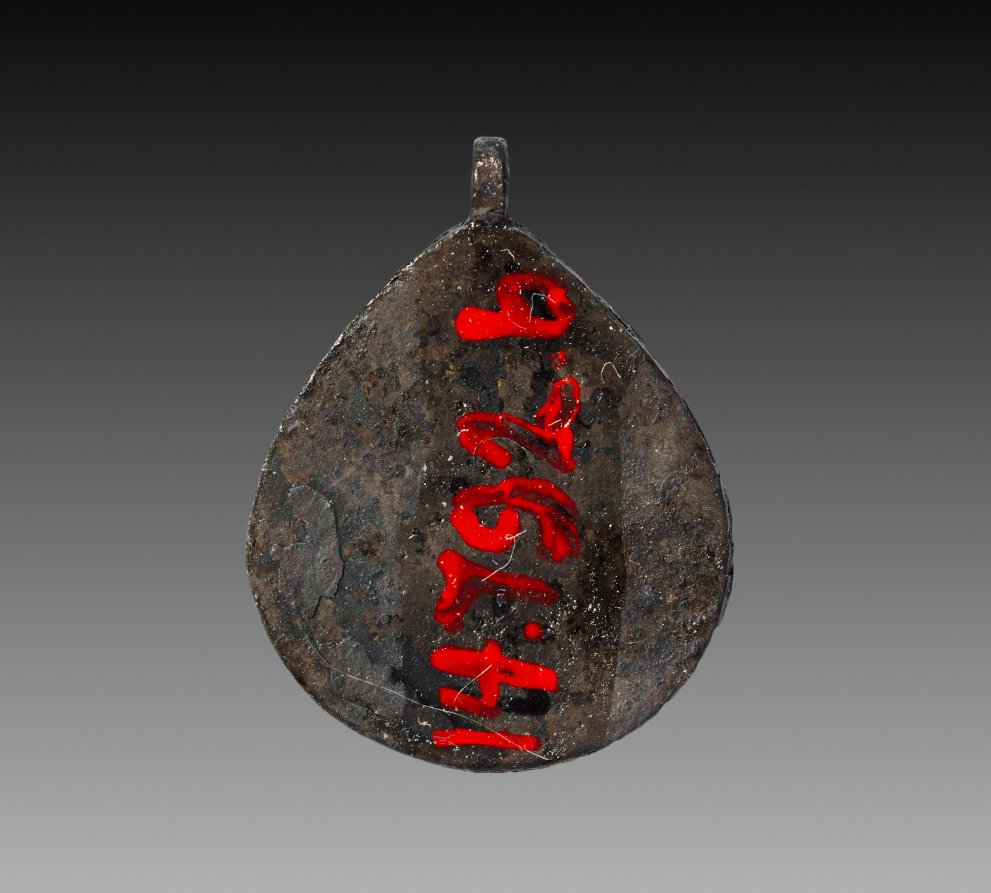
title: Oyster-Shell Pendant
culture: Egypt, Middle Kingdom (2040–1648 BCE), Dynasty 12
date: 1980–1801 BCE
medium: carnelian and silver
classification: Jewelry